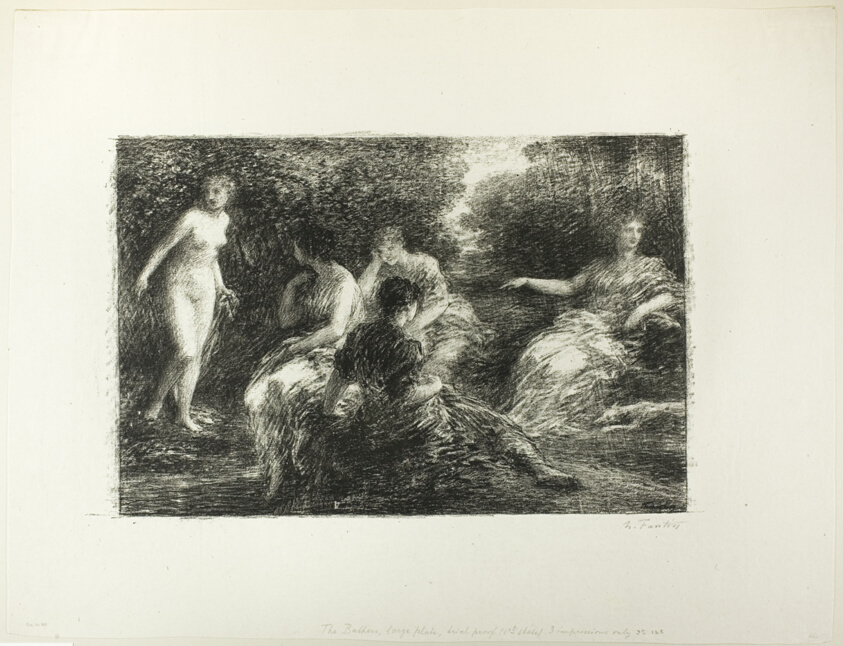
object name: Print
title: Bathing Women, third large plate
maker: Henri Fantin-Latour (French, 1836-1904)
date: 1896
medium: Lithograph in black on ivory chine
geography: France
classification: lithograph; print; prints and drawing